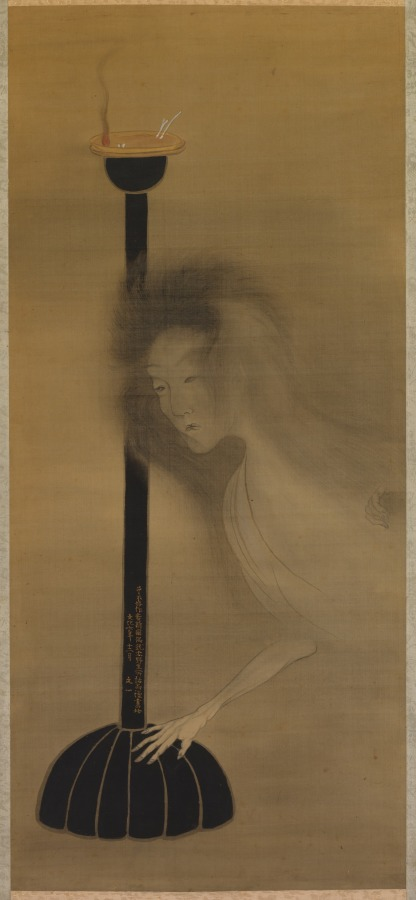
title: Ghost and Oil Lamp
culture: Japan, Edo period (1615–1868)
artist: Tani Bun'ichi (Japanese, 1787–1818)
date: 1810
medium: hanging scroll, ink, color, and gold on silk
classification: Painting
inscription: artist's inscription on stem of oil lamp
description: Tani Bun’ichi was the adopted son of Tani Buncho (1763-1840), a master painter and connoisseur. A Bun’ichi painting remarkably similar to this one that depicts a ghost by a lacquer lamp stand, is in the collection the Tokyo temple Zensho-an. That painting once belonged to Sanyutei Encho (1839-1900), a famed raconteur of ghost stories who donated his collection of ghost paintings to the temple. An inscription in gold on the lamp stand in this painting, identical in content to that on the Zensho-an painting, indicates that it was executed in the 12th month of 1810. Bun’ichi explains that he did not like painting ghosts, but tried it out after listening to a person by the name of Ono.